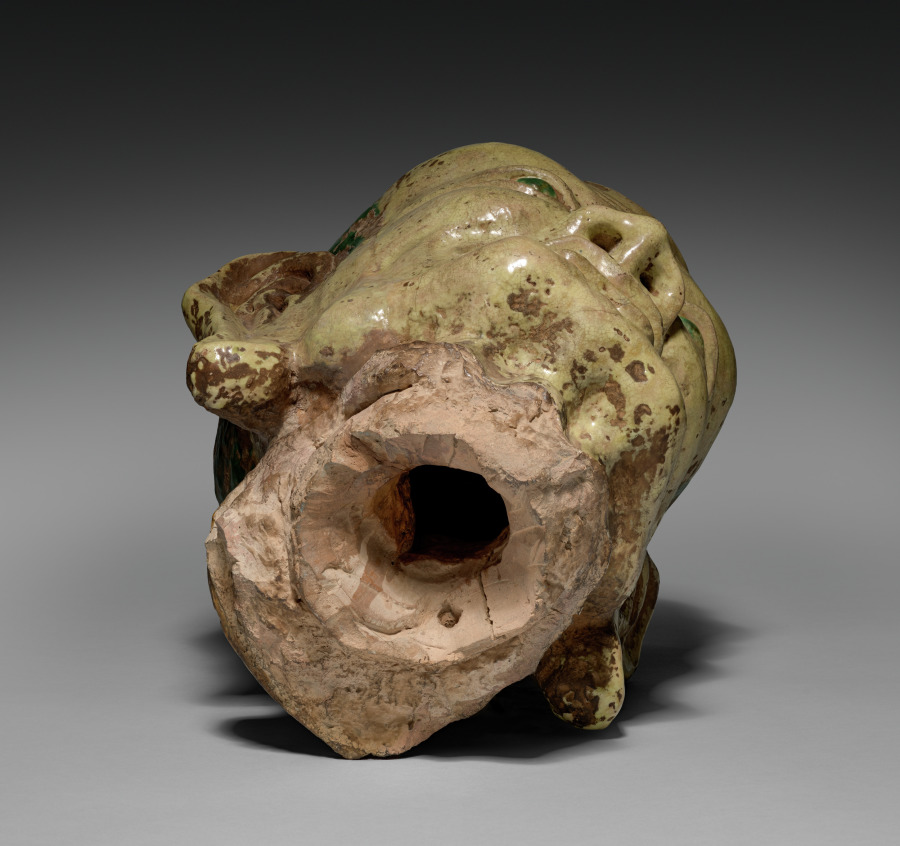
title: Head of a Lohan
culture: China, Ming dynasty (1368–1644)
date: 1368–1644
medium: earthenware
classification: Sculpture